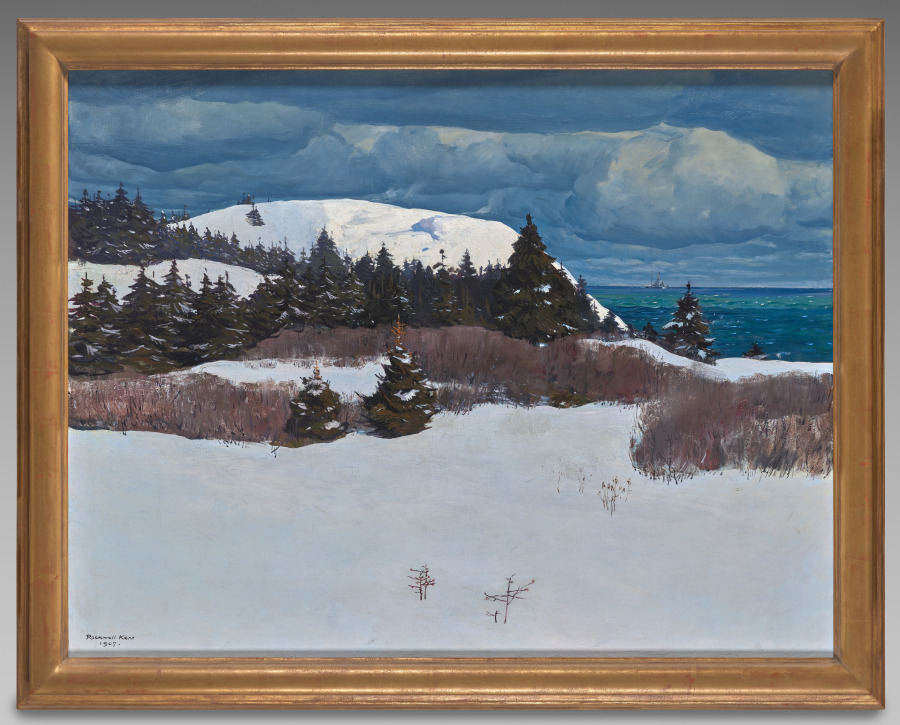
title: Maine Coast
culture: America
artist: Rockwell Kent (American, 1882–1971)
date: 1907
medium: oil on canvas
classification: Painting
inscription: signed lower left: Rockwell Kent / 1907.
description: Located off the coast of Maine, Monhegan Island has long drawn artists attracted to its rugged headlands, brooding forests, and dramatic ocean vistas. Unlike most colleagues who visited during summer, Kent built a home and lived there year-round, working as a well digger, lobsterman, and carpenter from 1906–8. This boldly rendered winter scene was painted from his studio window.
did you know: Kent loved to paint landscapes in cold, remote areas, including Maine, Alaska, Newfoundland, and Greenland.